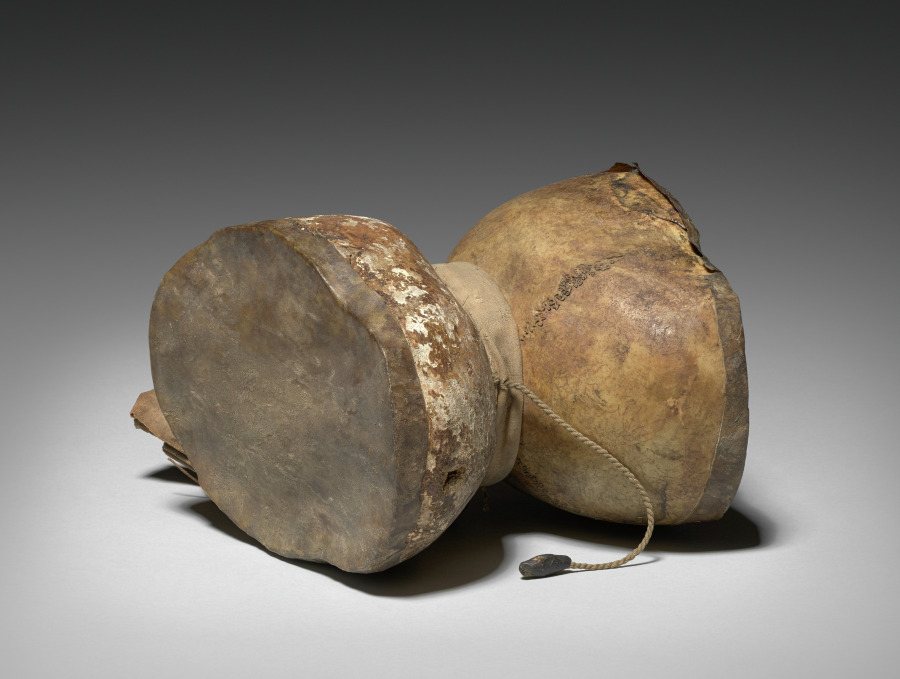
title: Ritual Drum (damaru)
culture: Tibet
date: c. 1800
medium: skull bone, cloth, hemp fiber, leather, and skin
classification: Musical Instrument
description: Damaru drums are made from the tops of two skulls joined in the center and sounded by rapidly turning it side to side so the ends of the cords fly up to sound against the stretched skin. In Hindu and Buddhist rituals, the rhythm of the damaru references the ongoing, relentless beat of time. The material of bone reminds practitioners of the inevitability of death in the course of time.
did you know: Dancing Shiva, in his form as Nataraja, holds a damaru in one hand.